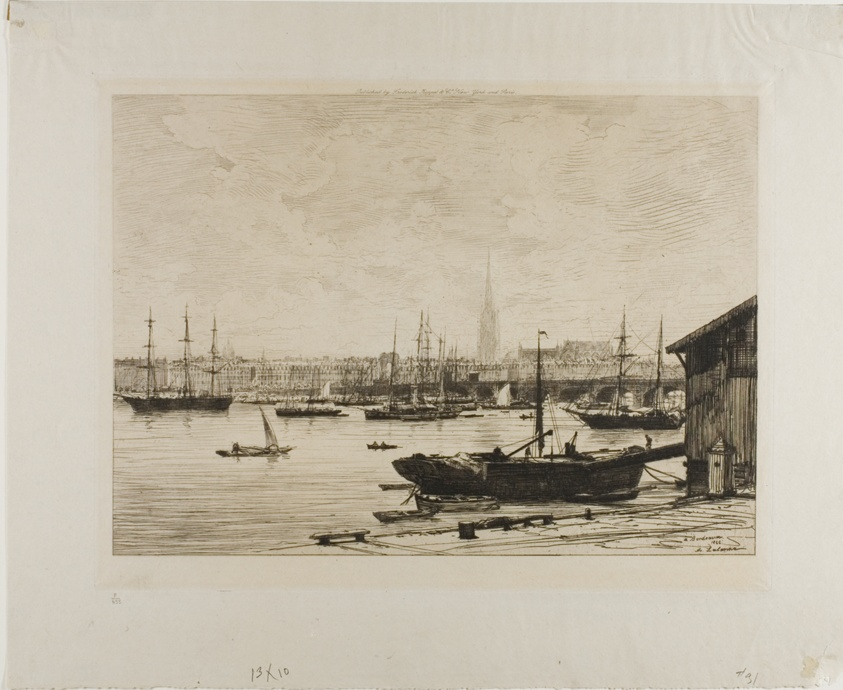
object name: Print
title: At Bordeaux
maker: Maxime Lalanne (French, 1827-1886)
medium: Etching on Japanese paper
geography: France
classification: etching; print; prints and drawing